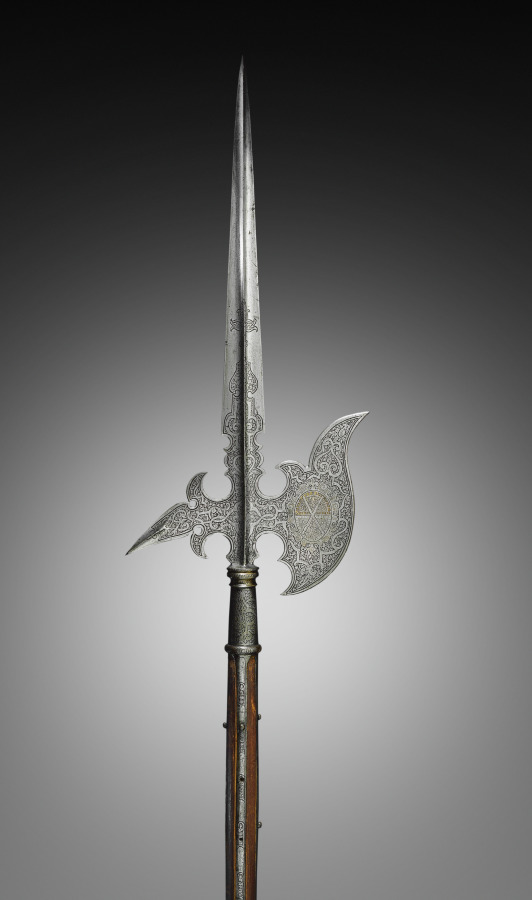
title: Parade Halberd (from the state guard of Elector Christian I of Saxony [ 1560- 91])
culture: Germany, Saxony, late 16th Century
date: 1586–91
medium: steel, gilt and etched; round wood haft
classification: Arms and Armor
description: The halberd was a staff weapon favored by European infantries (foot soldiers) of the 1400s and 1500s for its versatility and deadly effect. The word halberd comes from the German words Halm (staff) and Barte (axe). The halberd is, in fact, an axe that served multiple functions: the axe blade was used for hacking, the spike for thrusting, and the beak for piercing plate armor or for pulling a knight from his saddle. The halberd was used by shock troops (those who lead an attack) and by Swiss and German mercenaries. After about 1550, the halberd gradually became less functional. Its large blade provided space for coats of arms and insignia. By the late 1500s, the parade halberd had become a ceremonial weapon for palace guards.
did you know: This halberd is typical of the parade weapons used by the more than one hundred palace guards of the Prince Elector of Saxony, Christian I.